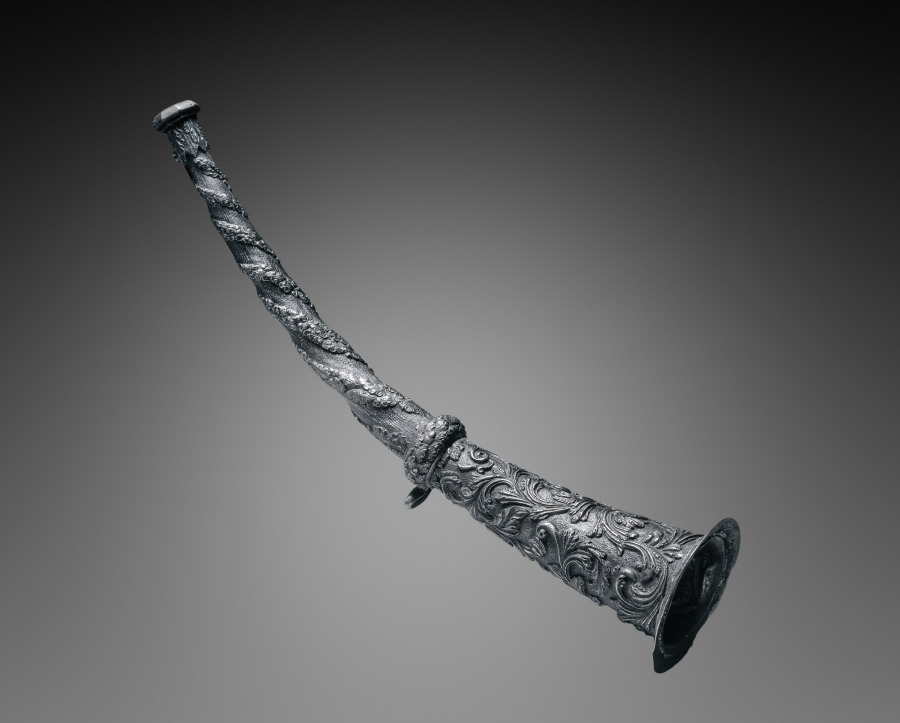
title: Hunting Horn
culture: Italy, late 16th-early 17th century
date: c. 1675–1725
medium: steel, embossed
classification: Arms and Armor